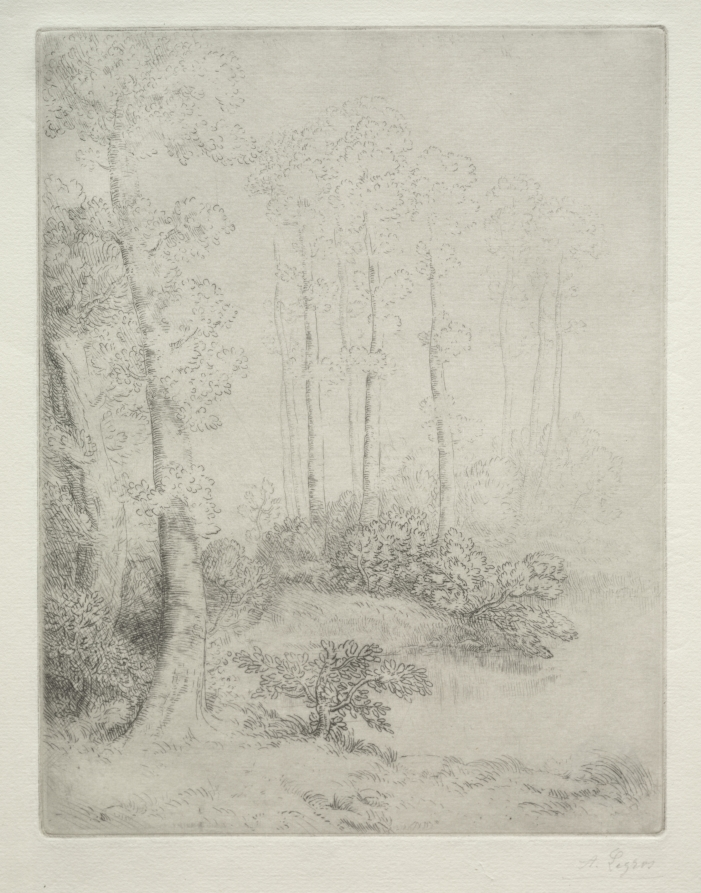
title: Edge of the Water (Au Bord de L'Eau)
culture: France, 19th-20th century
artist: Alphonse Legros (French, 1837–1911)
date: c. 1857–1911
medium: etching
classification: Print